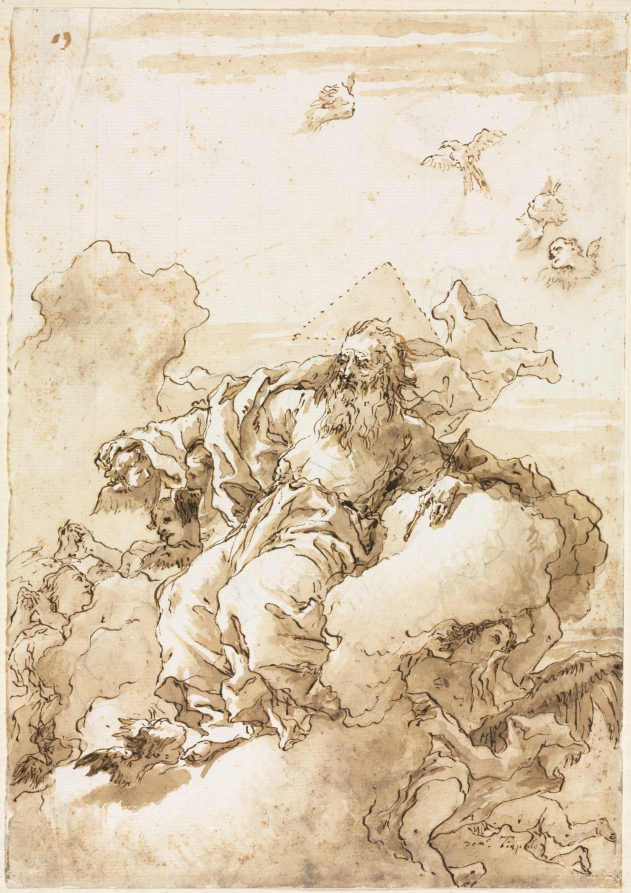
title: God the Father with Symbol of the Trinity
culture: Italy, 18th century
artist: Giovanni Domenico Tiepolo (Italian, 1727–1804)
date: 1758 or after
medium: pen and brown ink and brush and brown wash over traces of black chalk; traces of framing lines in silver paint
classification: Drawing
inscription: signed, lower right, in brown ink: Dom°. Tiepolo f ; upper left, in brown wash: 19 ; VERSO OF SECONDARY SUPPORT, upper left and center left, in graphite: C 183 .DM Tiepolo Godef[ry?] 1927 / Princeton 1928 [sideways] ; lower center, in graphite: C. 183